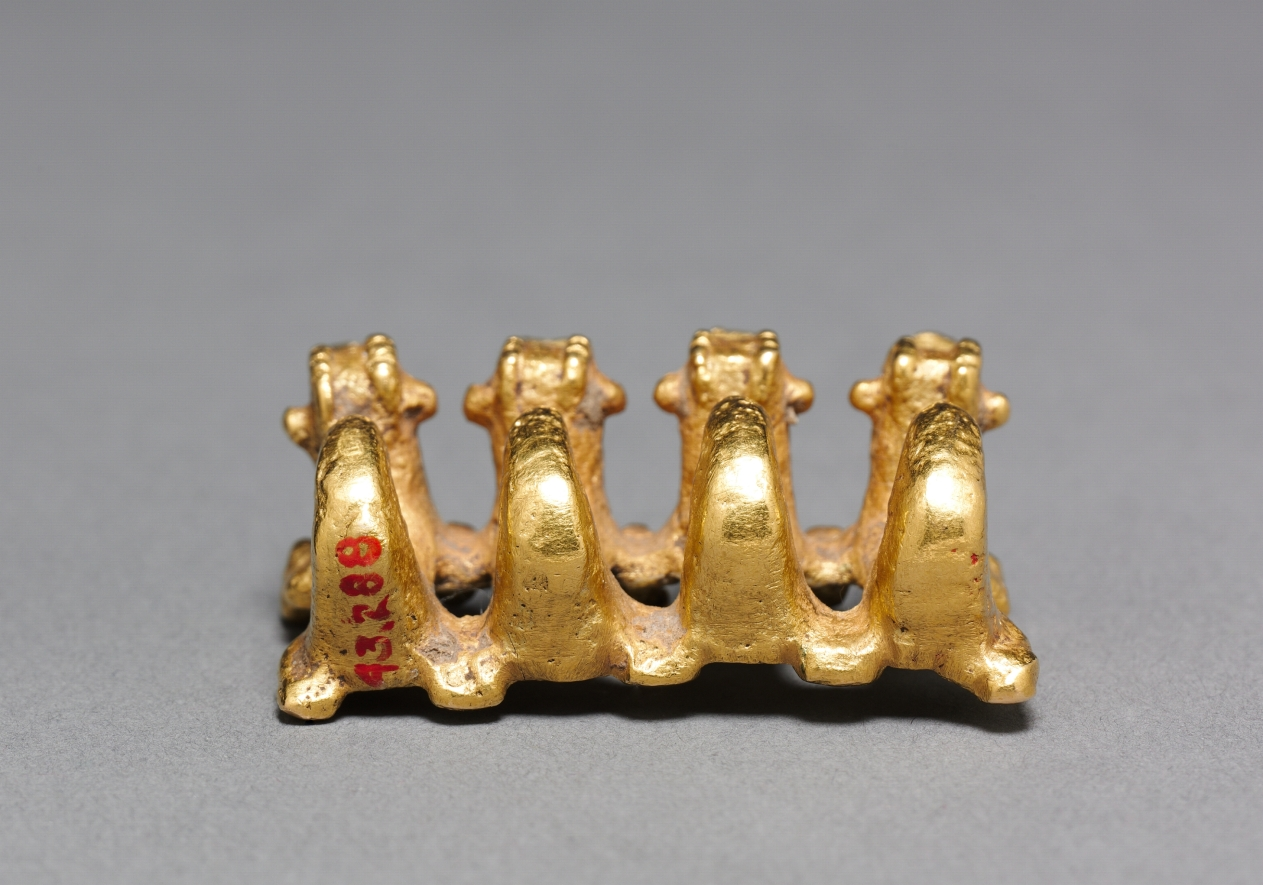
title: Curly-Tailed Animal Pendant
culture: Panama, Initial style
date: 100–800 CE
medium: gold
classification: Metalwork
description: A favored Initial-style subject is a charming animal whose curly tail -- its most impressive feature -- may derive from a monkey’s. Its other traits vary considerably, causing it to be identified as everything from a dog to a duck. Initial-style gold ornaments represent Panama’s oldest metalwork. Since metal technologies appeared suddenly and fully developed in Panama, it is likely that they were introduced from the outside, probably from Colombia to the south.